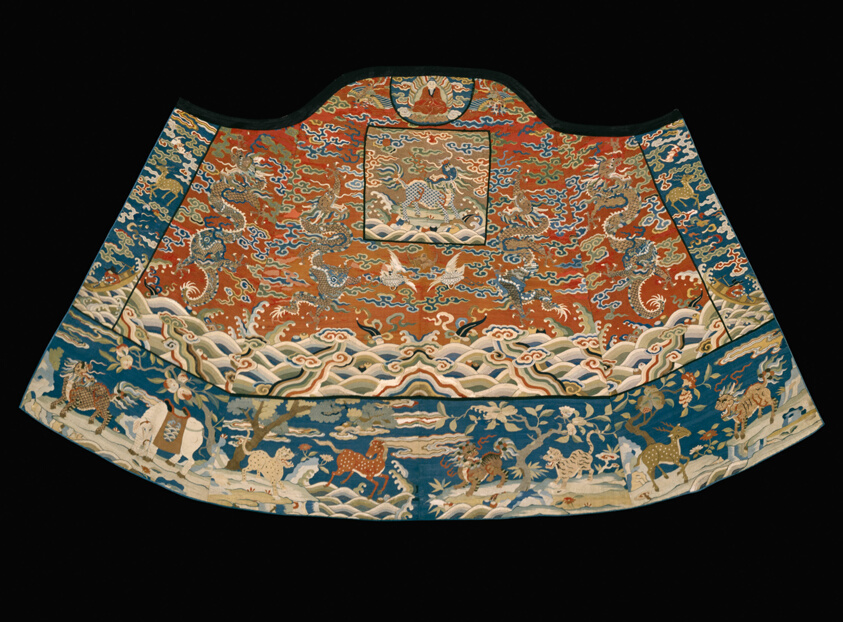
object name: Textile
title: Buddhist Monk's Cape (Incomplete)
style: qing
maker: China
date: Qing dynasty (1644–1911), 1650/1700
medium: Silk, gold-leaf-over-lacquered-paper-strip-wrapped silk, and peacock feathers, slit tapestry weave with interlaced outlining wefts; painted details; edged with silk, warp-float faced 7:1 satin weave; top facing edged with silk, plain weave; lined with silk, plain weave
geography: China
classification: textile; weaving; costume